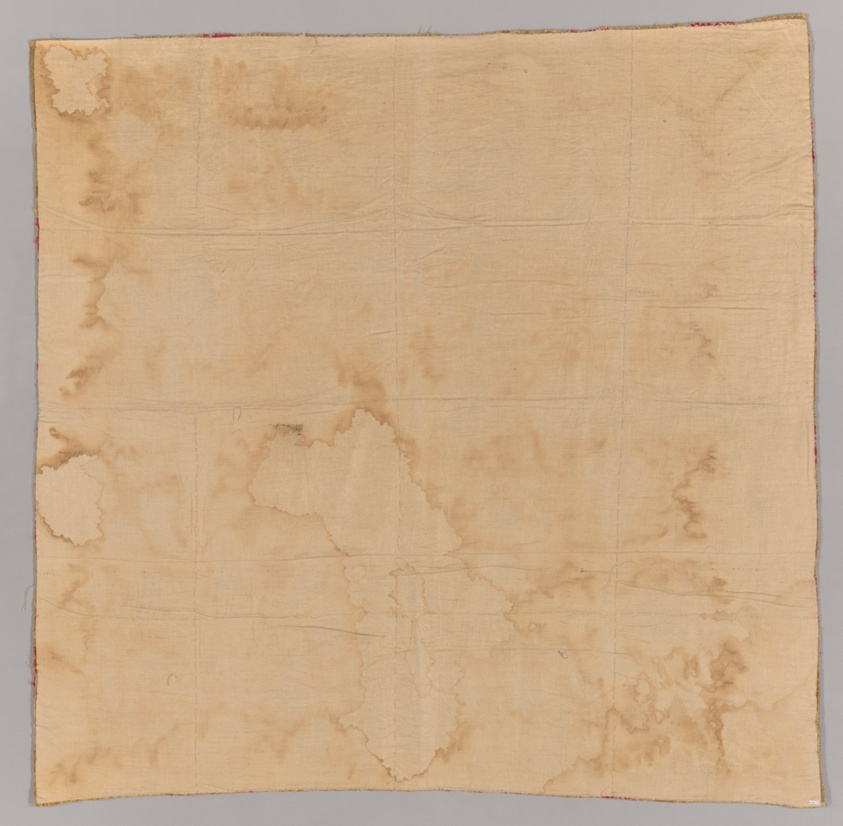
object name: Textile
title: Needlework Rug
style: 18th Century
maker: English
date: 18th century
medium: Wool, canvas, linen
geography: England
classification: needlework - rug; textile; embroidery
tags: flowers, floral motifs, medallions, foliage, squares